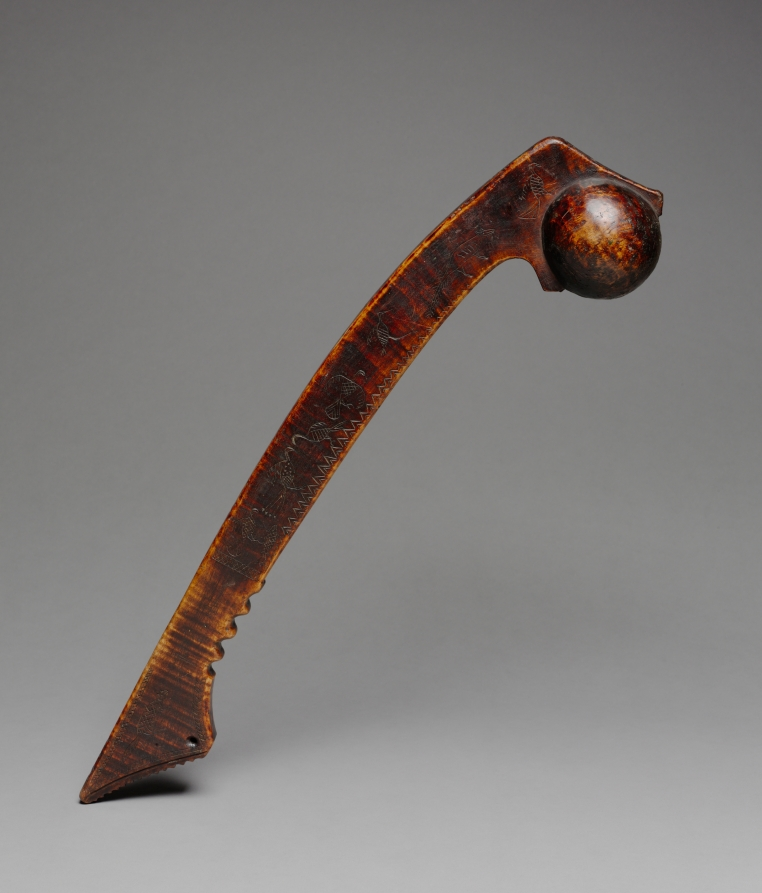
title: Ball-Headed War Club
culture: Native North America, Northeastern Woodlands, Great Lakes, Anishinaabe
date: late 1700s–early 1800s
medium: wood (maple?)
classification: Implements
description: The ball at the striking end of this club is clenched in an abstract, jawlike form that likely refers to a protector animal who endowed the owner with power. Incised on the shaft is a rich record of doodemag (singular, doodem, “totem”)—animals representing other-than-human progenitors from which Anishinaabe peoples trace their descent. (The Anishinaabeg, a group of related Great Lakes nations, include the Odawa, Ojibwe, Potawatomi, and others.) Included is an antlered creature, perhaps a caribou, along with mammals, birds, and powerful spirit beings: the thunderbird, its wings outstretched, and perhaps the long-tailed underwater panther. When this example was made, clubs had become symbols of status and earlier ways of life, having been replaced as favored weapons by metal tomahawks and European firearms. Today, clubs are part of powwow regalia.